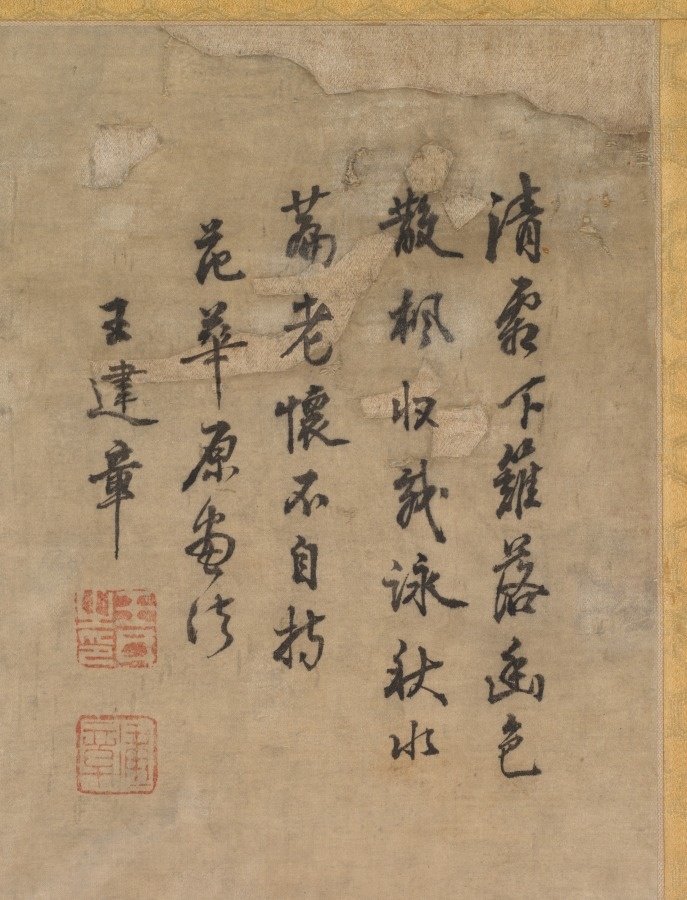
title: Solitary Colors of the Autumn Woods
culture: China, Ming dynasty (1368–1644)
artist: Wang Jianzhang (Chinese, active 1621–1662)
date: first half 1600s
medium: hanging scroll; ink and color on satin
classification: Painting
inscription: Artist's inscription, signature, and 2 seals: Cold frost falls on the fences,/ Solitary colors scatter the maples./ Reciting the chapter of "The Autumn Water,"/ I cannot still the emotion in my old heart. After the style of Fan Hua-yüan [Fan Kuan], Wang Chien-chang . [seals] Wang shih chih yin; Chien-chang. trans. LYSL/HK/WKH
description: Two gentlemen stand outside a thatched hut in a dense forest; some trees have bare branches indicating that the season is early autumn. Wang Jianzhang’s inscribed poem refers to a chapter called “Autumn Water” from Zhuangzi, a famous Daoist text written in the 3rd century BC: "Cold frost falls on the fences, / Solitary colors scatter the maples. / Reciting the chapter of “The Autumn Water,” / I cannot still the emotion in my old heart." Wang Jianzhang lived through the collapse of the Ming dynasty (1368–1644) and the rise of the Qing dynasty (1644–1911), when China was governed by the Manchus, an ethnic people from Manchuria who were traditionally viewed as “barbarians” by the Chinese. The poetic reference to Zhuangzi’s “Autumn Water” seems to discreetly convey Wang’s feelings about his country being taken over. “Autumn Water” was about learning to take steps in the foreign way, but not acquiring a foreign tongue. Perhaps Wang was lamenting his conflicted situation. For survival he had to adapt to the new political and social climate, while still trying to maintain his own identity and Chinese traditions.